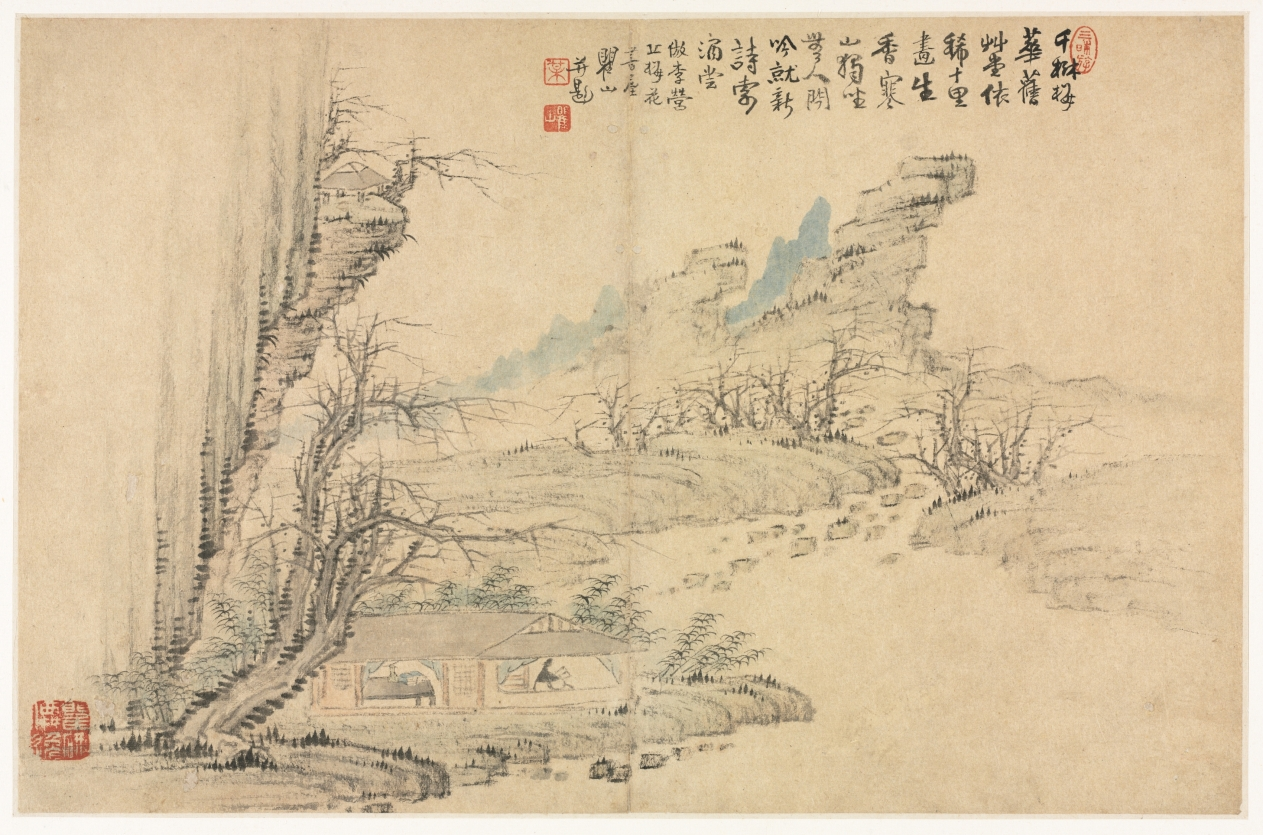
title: Landscapes in Various Styles after Old Masters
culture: China, Qing dynasty (1644-1911)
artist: Mei Qing (Chinese, 1623–1697)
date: 1690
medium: album leaf: ink and color on paper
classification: Painting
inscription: Spring Leaf I (formerly Leaf A). Artist's inscription, signature, and seals: [seal] Sanmei you. Prunus blossoms from a thousand trees and an old hut-/ The painting seems filled with their fragrance for a distance of ten miles./ In the wintry mountains I sit alone without company;/ Having just finished a new poem, I think I'll taste some wine. Imitating Li Yingqiu's [Li Cheng] "Prunus-Blossom Study." Qushan [painted] and inscribed. [2 seals] Mei; Qushan [seal, lower left corner] Quxing hsien-i.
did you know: Mei Qing produced a surge of new paintings after his 1690 tour of Huangshan’s breathtaking peaks.